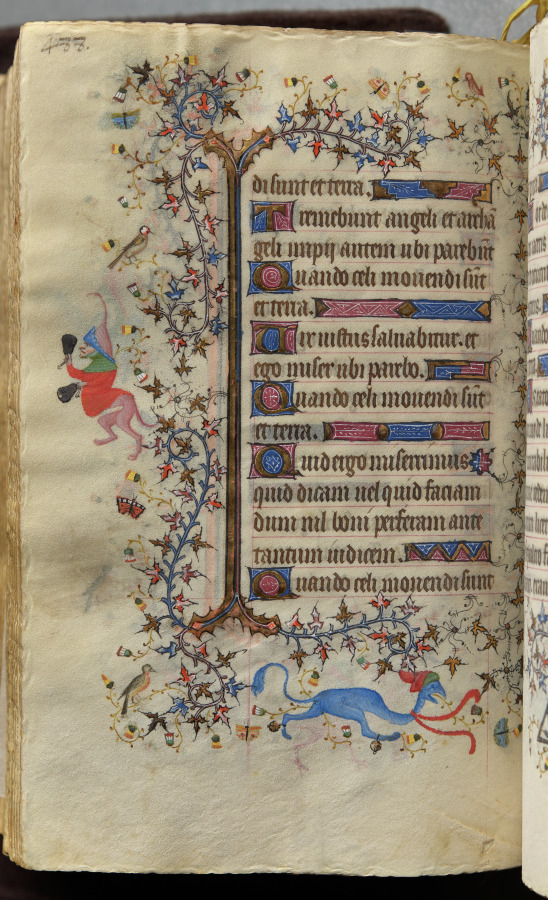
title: Hours of Charles the Noble, King of Navarre (1361-1425): fol. 238v, Text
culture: France, Paris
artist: Master of the Brussels Initials and Associates (French)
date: c. 1405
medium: ink, tempera, and gold on vellum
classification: Bound Volume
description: This precious volume was obviously highly prized by its owner, the French-born King of Navarre, who had his coat of arms painted on no less than twenty folios. Rather than directly commissioning this manuscript from a specific workshop, it seems that Charles the Noble acquired his book of hours -- perhaps ready-made for the luxury market -- while on a trip to Paris in 1404-05. A collaborative effort, six painting styles are evidenced within the pages of this codex, those of two Italians, two Frenchmen, and two Netherlanders. The painter who was responsible for the planning and decoration of the book, and who produced seventeen of the large miniatures, was a Bolognese artist known as the Master of the Brussels Initials. His principal assistant, responsible for most of the borders, was a Florentine who signed his name "Zecho" da Firenze on folio 208 verso.